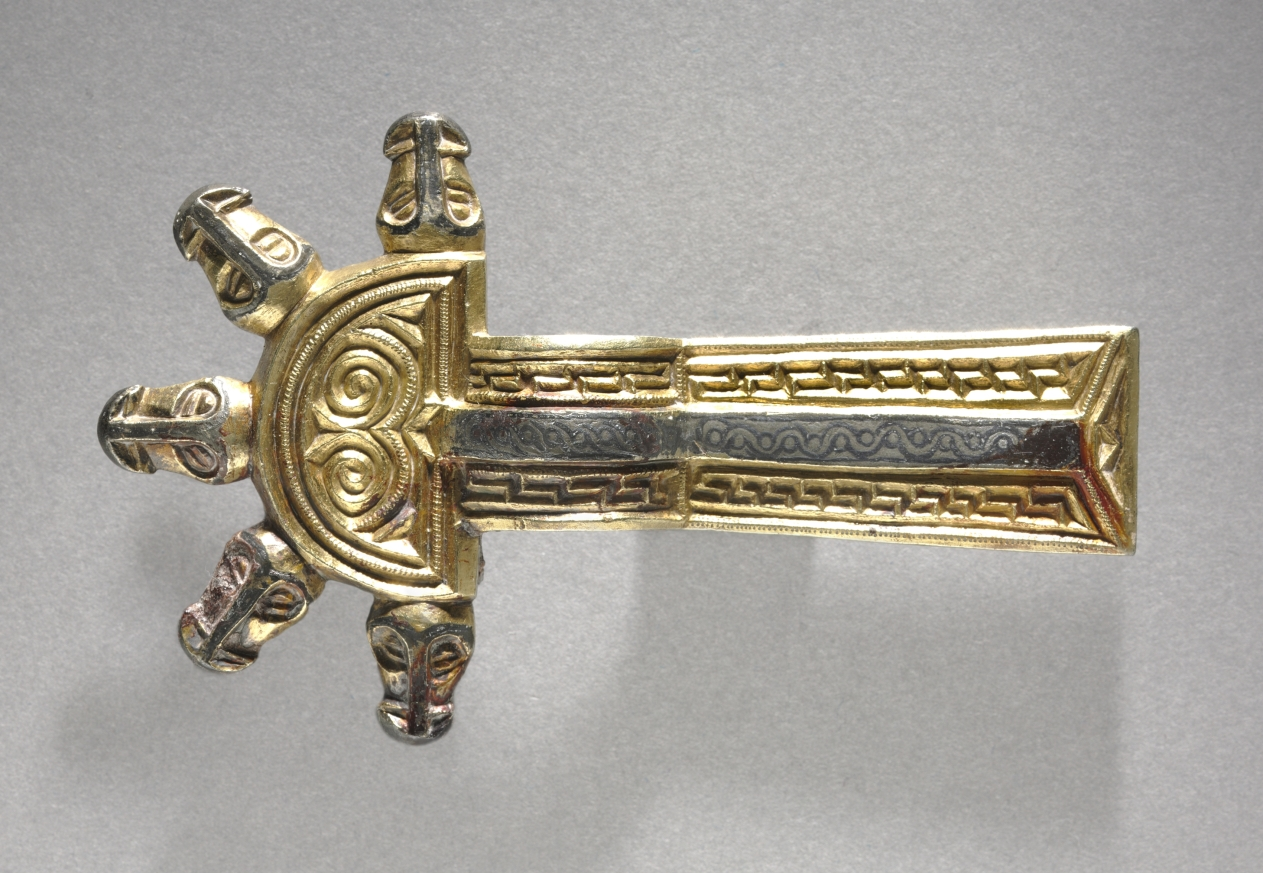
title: Fibulae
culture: Alemannic, Migration Period, 6th-7th century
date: 500s-600s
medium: cast silver, parcel-gilt, with niello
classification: Jewelry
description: A woman of high rank might have worn these twin fibulae on her shoulders, one fastening her inner garment on the right, the other her outer garment on the left. She might also have suspended them from her belt as decorative ornaments